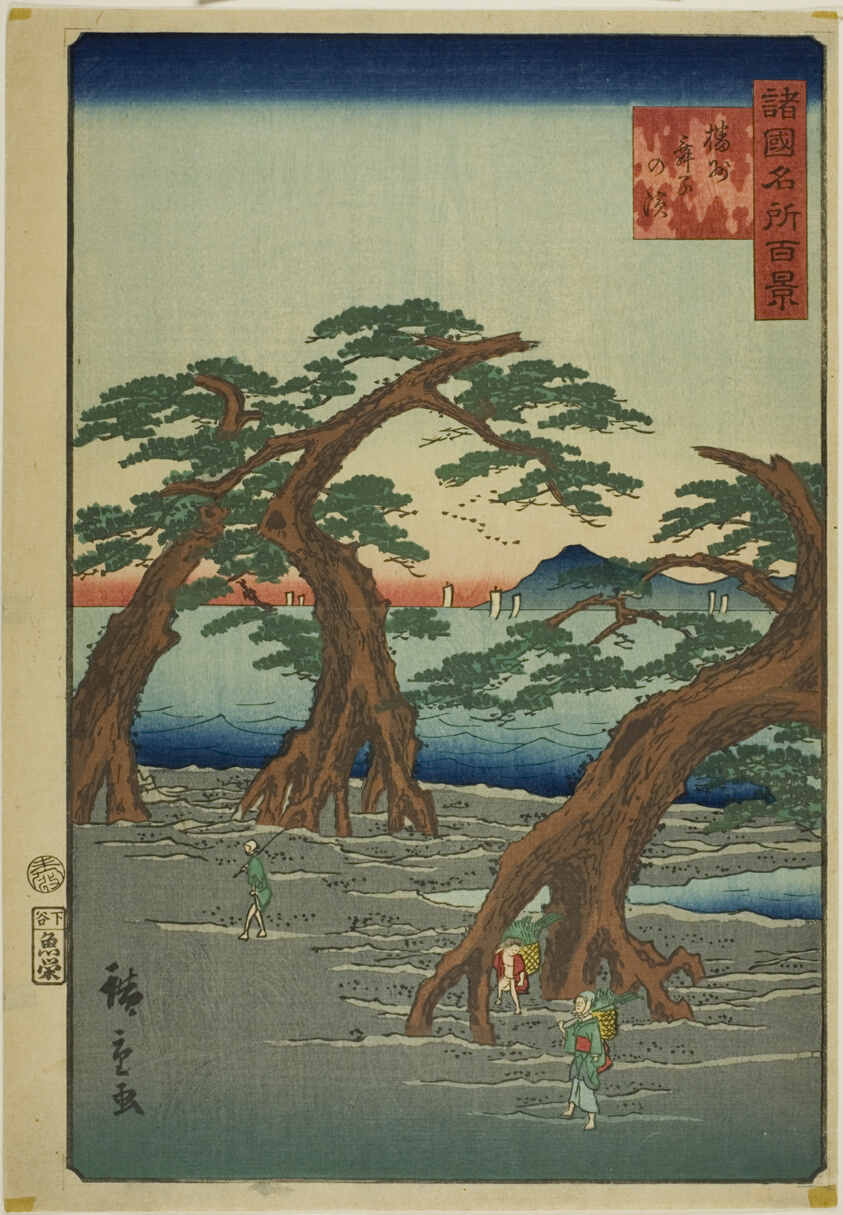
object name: Print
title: Maiko Beach, Banshu Province (Banshu Maiko no hama) from the series “One Hundred Famous Views in the Various Provinces (Shokoku meisho hyakkei)”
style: Japanese (culture or style)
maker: Utagawa Hiroshige II (Shigenobu) (Japanese, 1826–1869)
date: 1859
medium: Color woodblock print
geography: Japan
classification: woodblock print; print